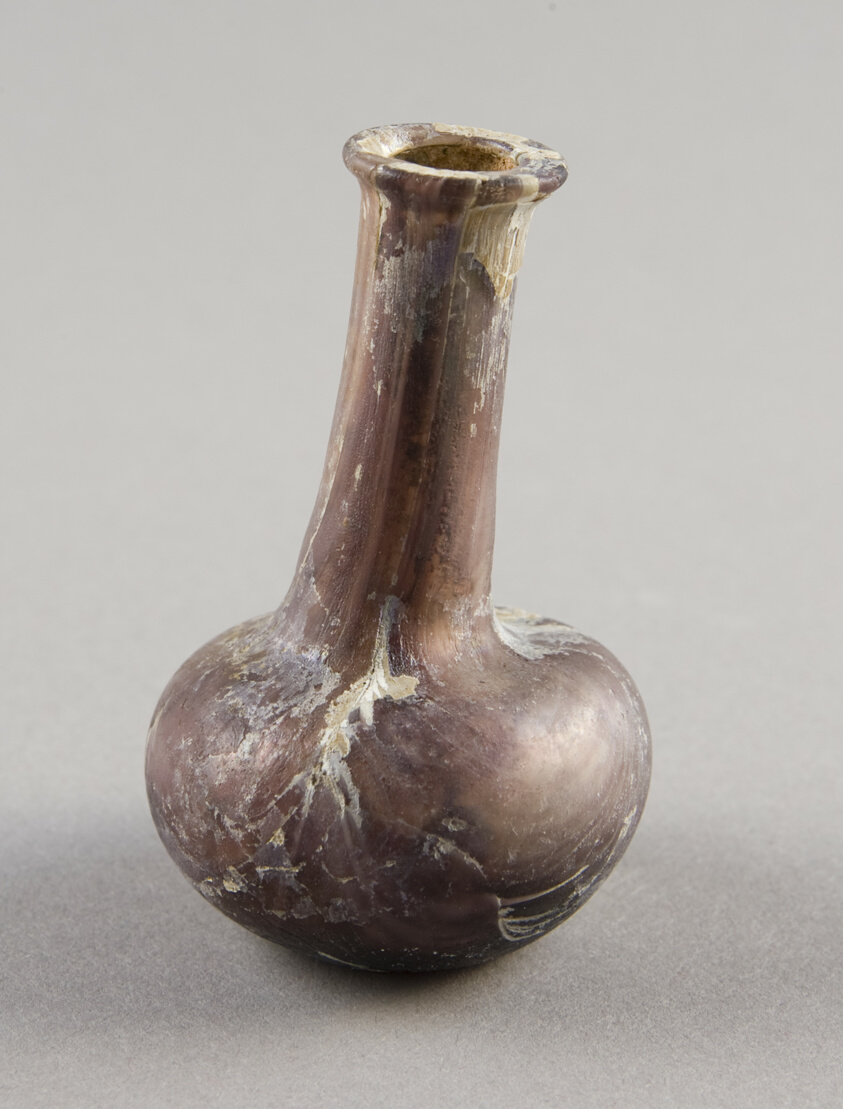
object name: Vessel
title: Bottle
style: roman (ancient, style or period), ancient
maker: Roman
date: about 1st century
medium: Glass, blown technique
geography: Italy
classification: glass; vessel; ancient art